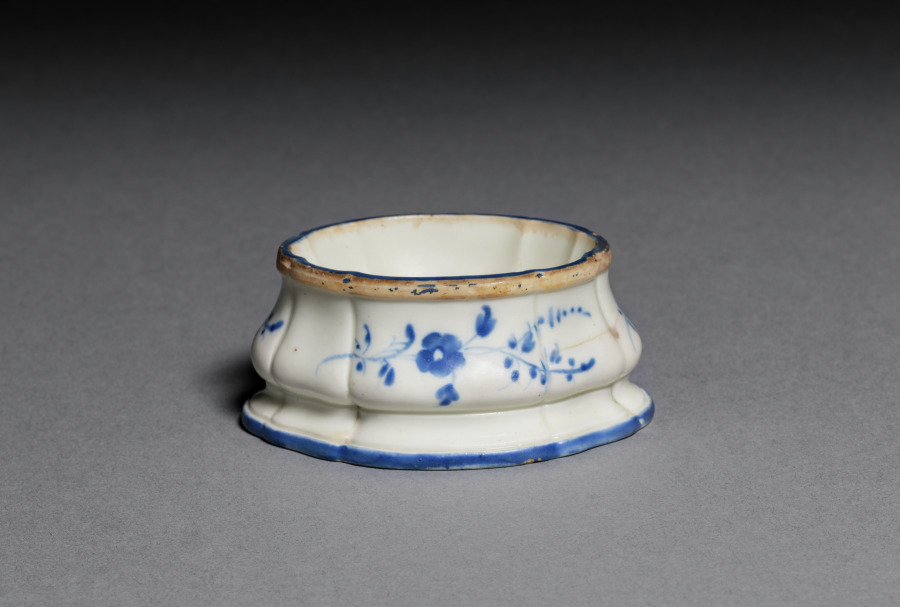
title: Salt Dish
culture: France, Orleans, 18th century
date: c. 1775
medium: soft-paste porcelain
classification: Ceramic